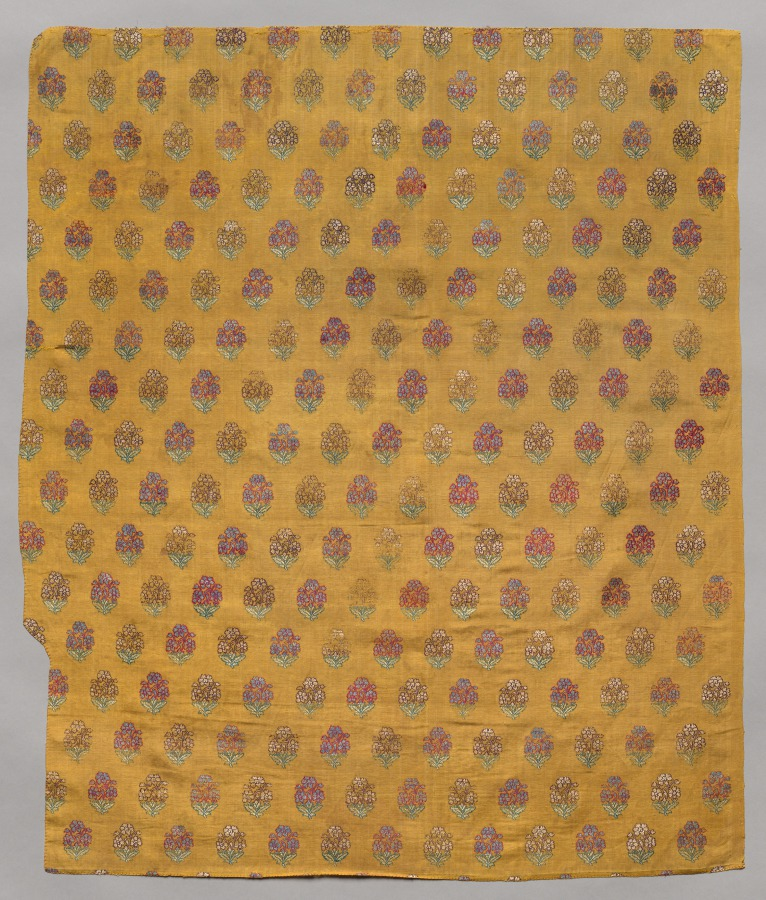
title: Brocade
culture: India, Surat, 19th century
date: 1800s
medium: brocade, "himru"; silk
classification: Textile